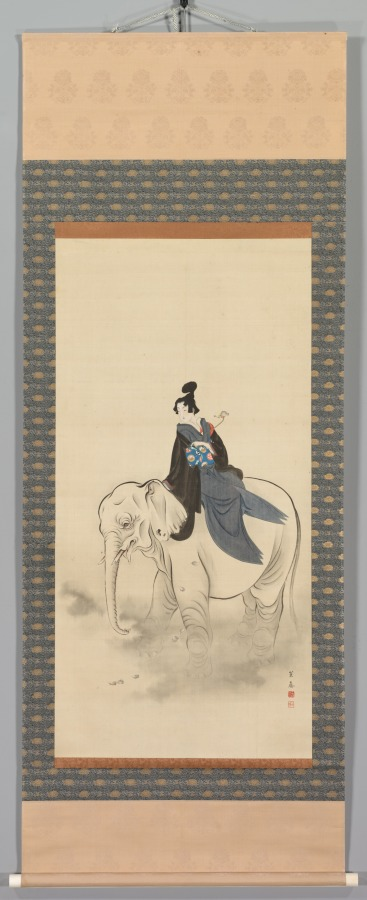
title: Stand-in Fugen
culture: Japan, Edo period (1615–1868)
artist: Kitao Masayoshi (Japanese, 1761–1824)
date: late 1700s–early 1800s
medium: hanging scroll; ink and color on silk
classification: Painting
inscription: artist's signature and two seals, lower right.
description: Here, a woman dressed as a man replaces Fugen, a bodhisattva—a being among those considered enlightened in Buddhism—who symbolizes learning as a path to awakening and typically rides an elephant. The painting teaches the lesson of impermanence through the petals falling from the lotus flower the woman holds. It also alludes to the legend of Eguchi, a 12th-century courtesan who, following an encounter with a Buddhist monk-poet called Saigyō, revealed herself to be a manifestation of Fugen.